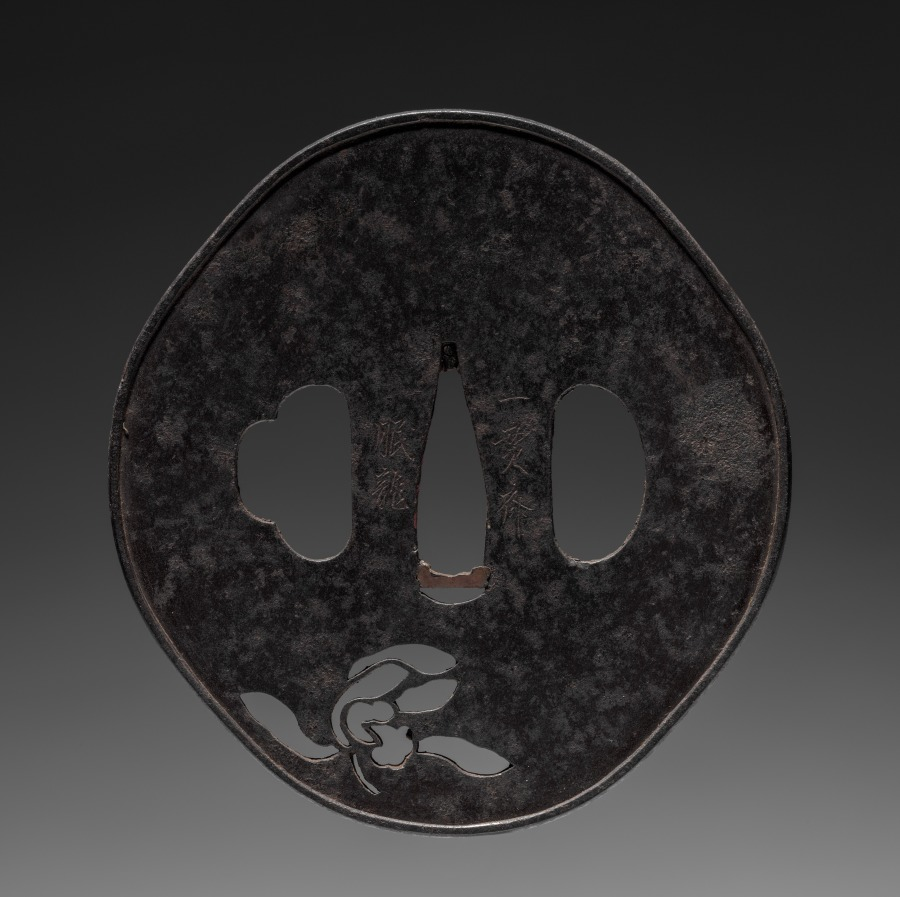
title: Sword Guard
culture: Japan, Edo period (1615–1868)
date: early 1800s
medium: iron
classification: Arms and Armor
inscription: signed: 一貫斎、眠龍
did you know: This sword guard has been attributed to the Otsuki school.